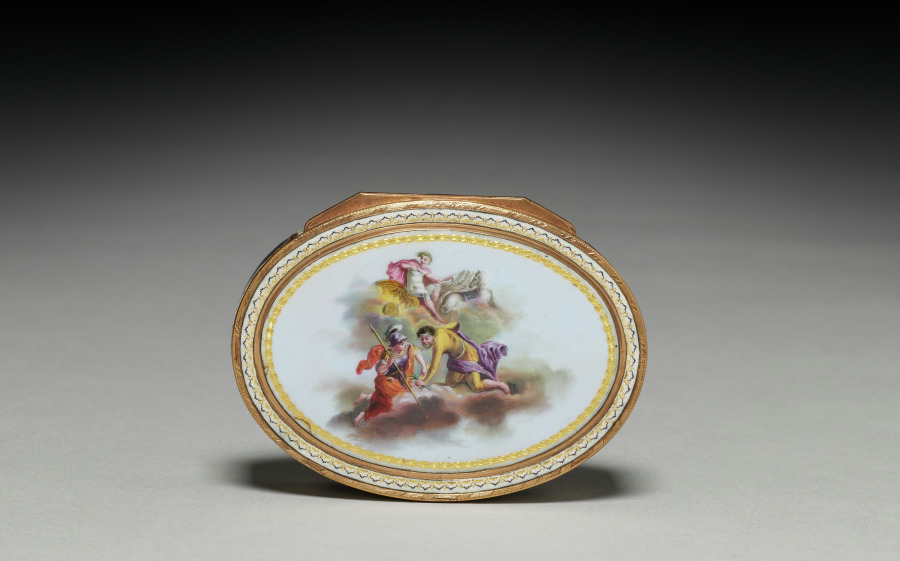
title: Box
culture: Switzerland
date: late 1700s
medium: gold and enamel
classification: Miscellaneous